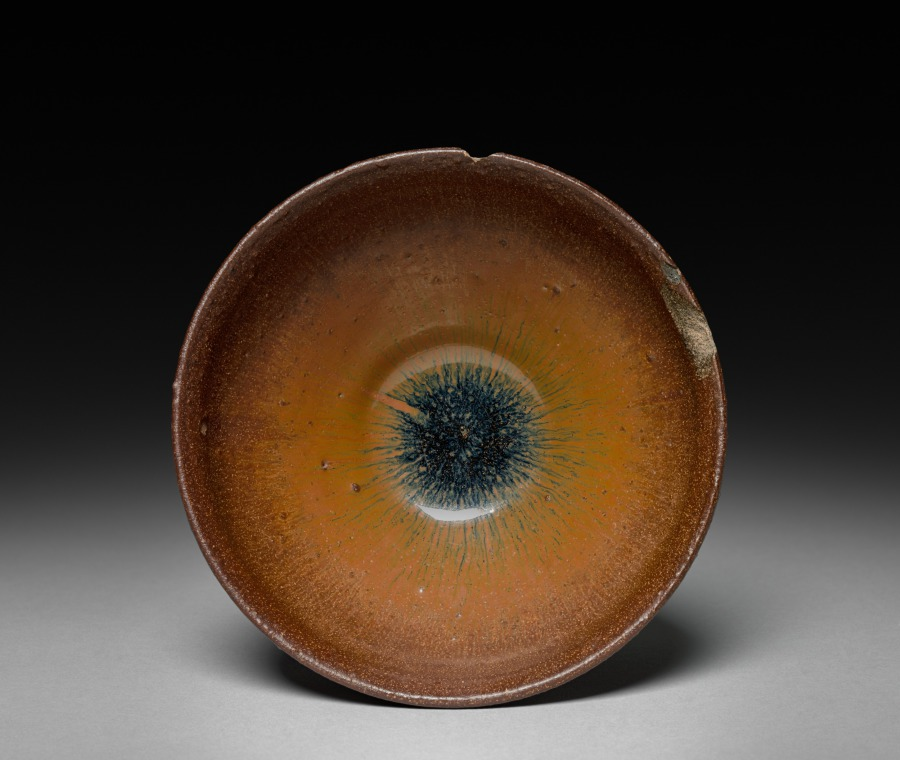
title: Tea Bowl: Jian ware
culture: China, near Shui ch'i, Song dynasty (960-1279)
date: 960–1279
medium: stoneware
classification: Ceramic